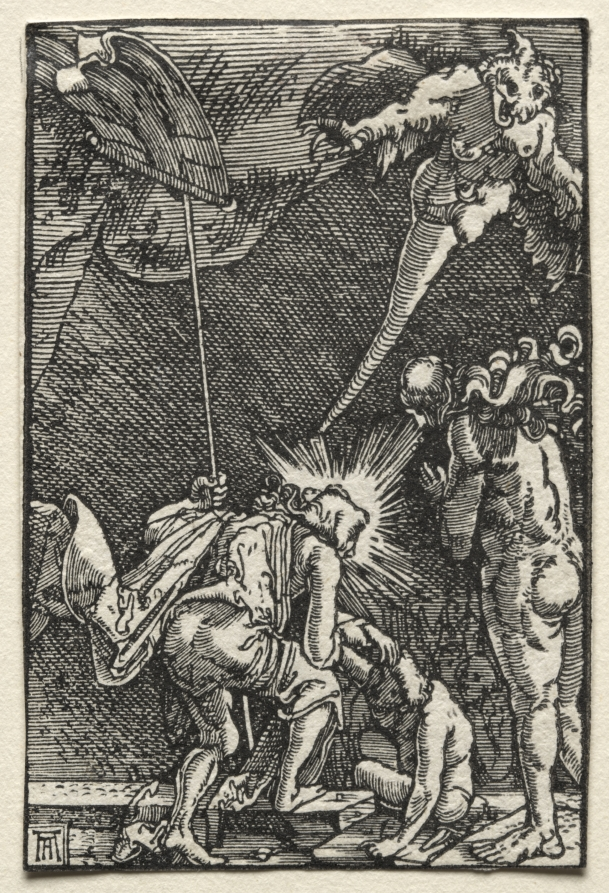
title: The Fall and Redemption of Man: Descent into Hell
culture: Germany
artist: Albrecht Altdorfer (German, c. 1480–1538)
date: c. 1515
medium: woodcut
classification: Print